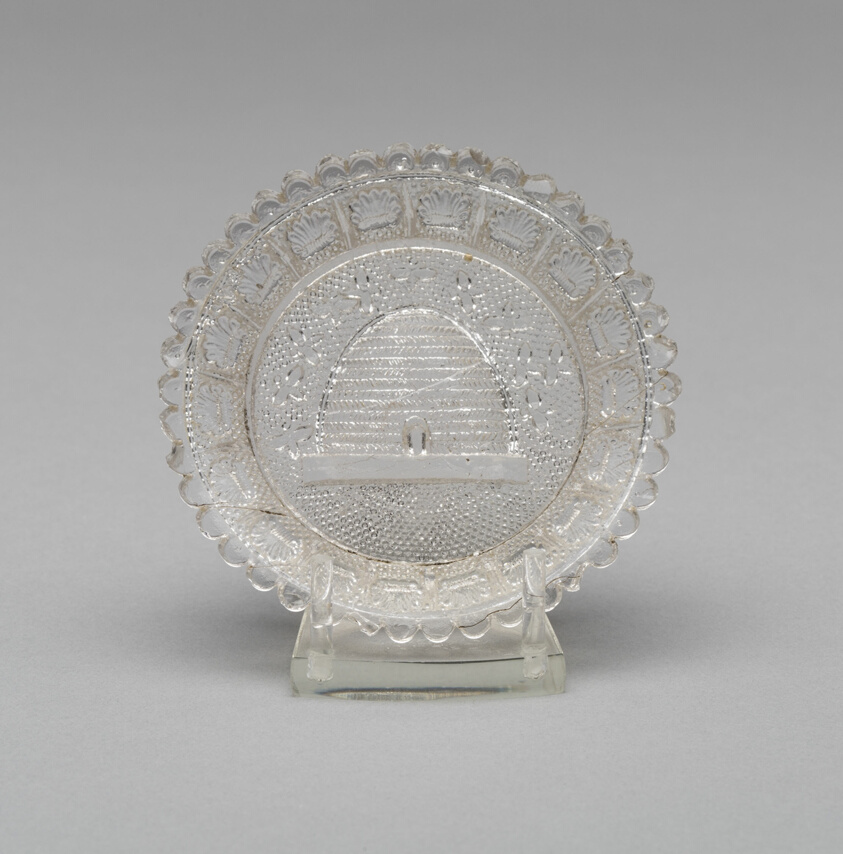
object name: Glass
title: Cup plate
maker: Artist unknown (American, 19th century); Midwest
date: 1830–35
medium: Pressed glass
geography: Midwest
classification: plate (general, dish); glass; american decorative arts; american arts; decorative arts